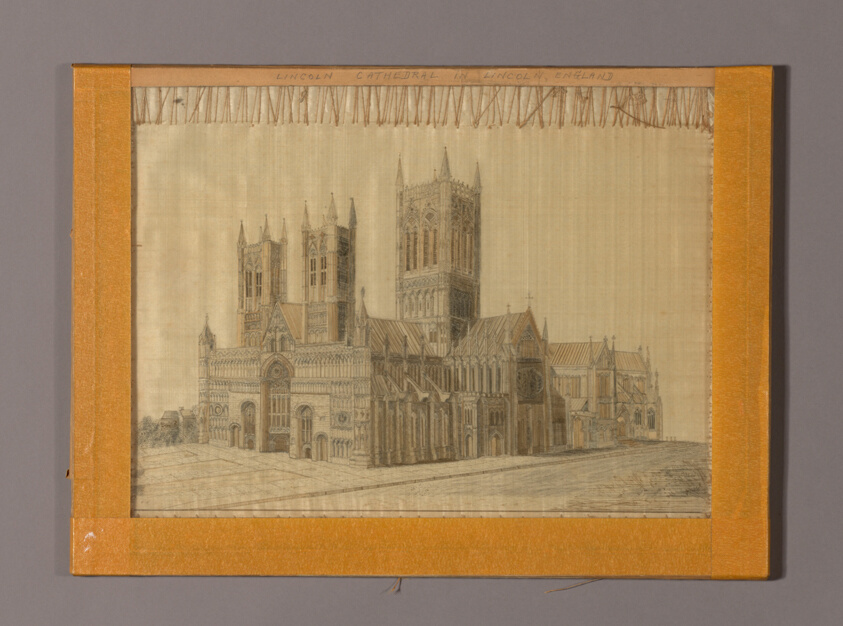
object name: Textile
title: Picture of the Cathedral at Lincoln, England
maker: England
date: 1870/80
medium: Silk, embroidered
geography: Lincoln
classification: textile; needlework (visual works)